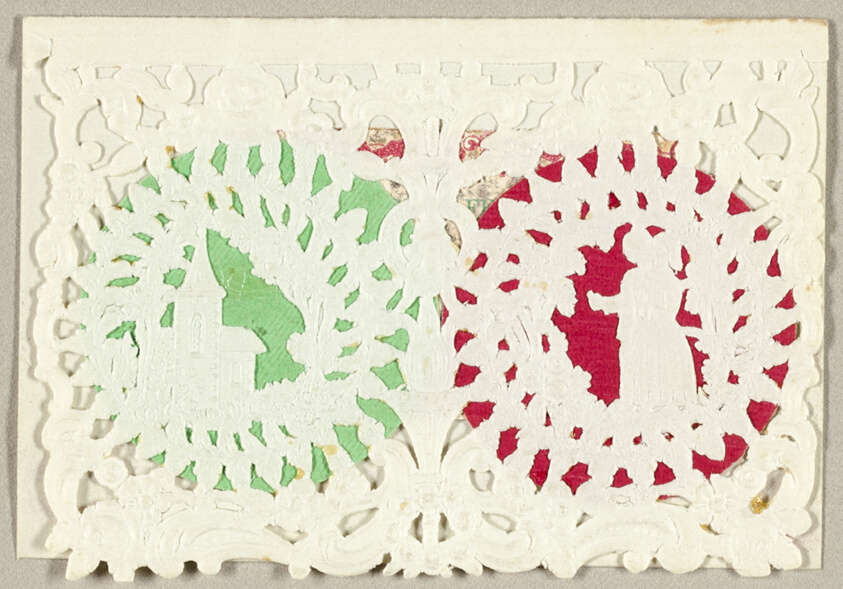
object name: Print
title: Untitled Valentine (Church and Couple)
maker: Thomas Wood (English, 19th century)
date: c. 1850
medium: Cut and embossed (designed) ivory wove paper with blue and pink wove paper inserts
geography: England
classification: collage; valentine; prints and drawing; print